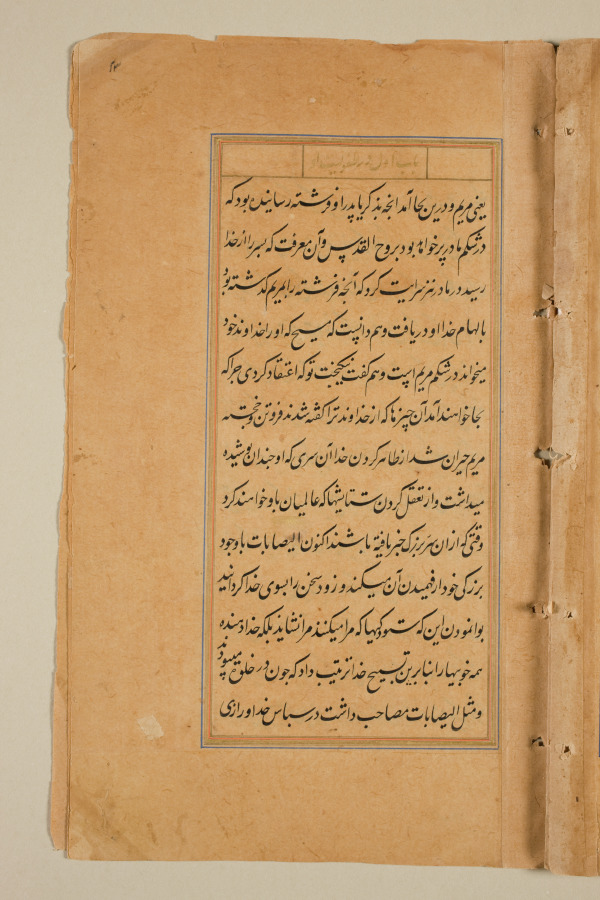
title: Text page from a Mirror of Holiness (Mir’at al-quds) of Father Jerome Xavier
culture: Mughal India, Allahabad, made for Prince Salim (1569–1627)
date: 1602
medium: Ink and gold on paper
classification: Manuscript